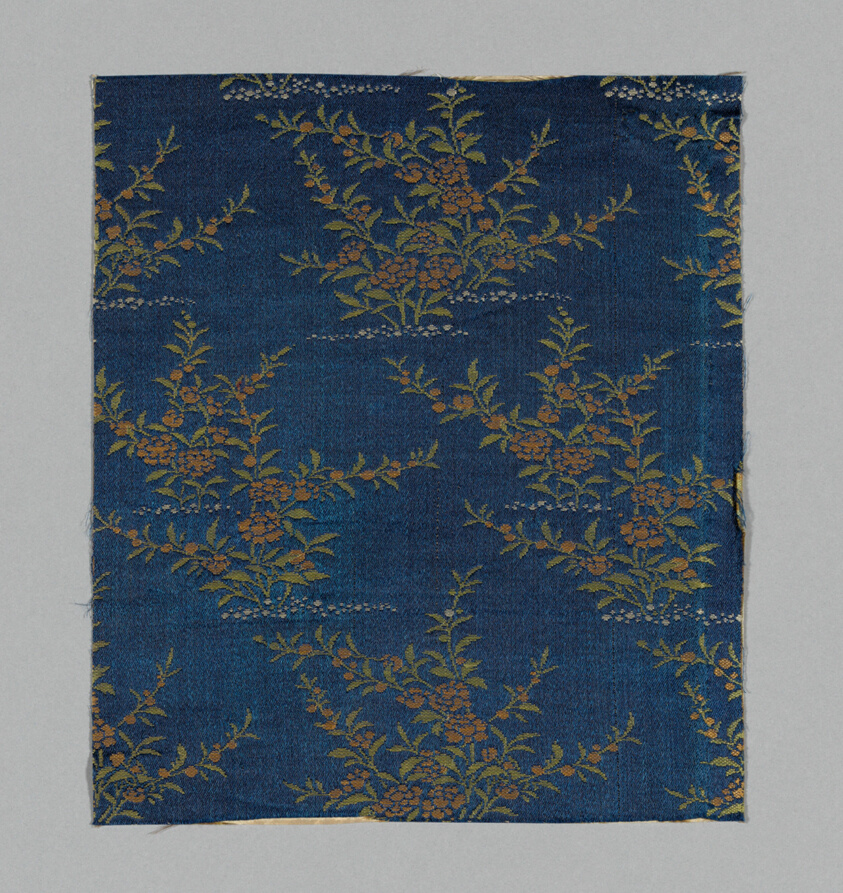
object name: Textile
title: Fragment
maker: Japan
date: late Edo period (1789–1868), 1800/25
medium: Silk, satin weave with supplementary patterning wefts bound by secondary binding warps in plain interlacings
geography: Japan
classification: textile; weaving